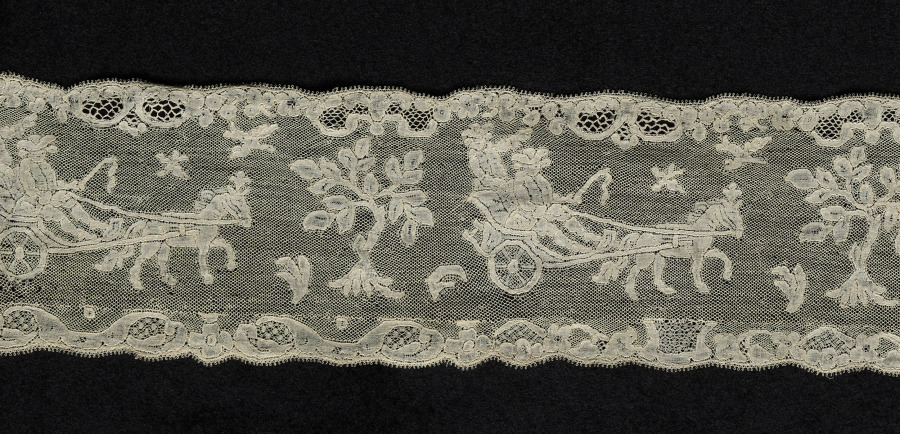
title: Part of a Lace Lappet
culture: Belgium, Mechelen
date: 1740–60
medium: Bobbin lace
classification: Lace